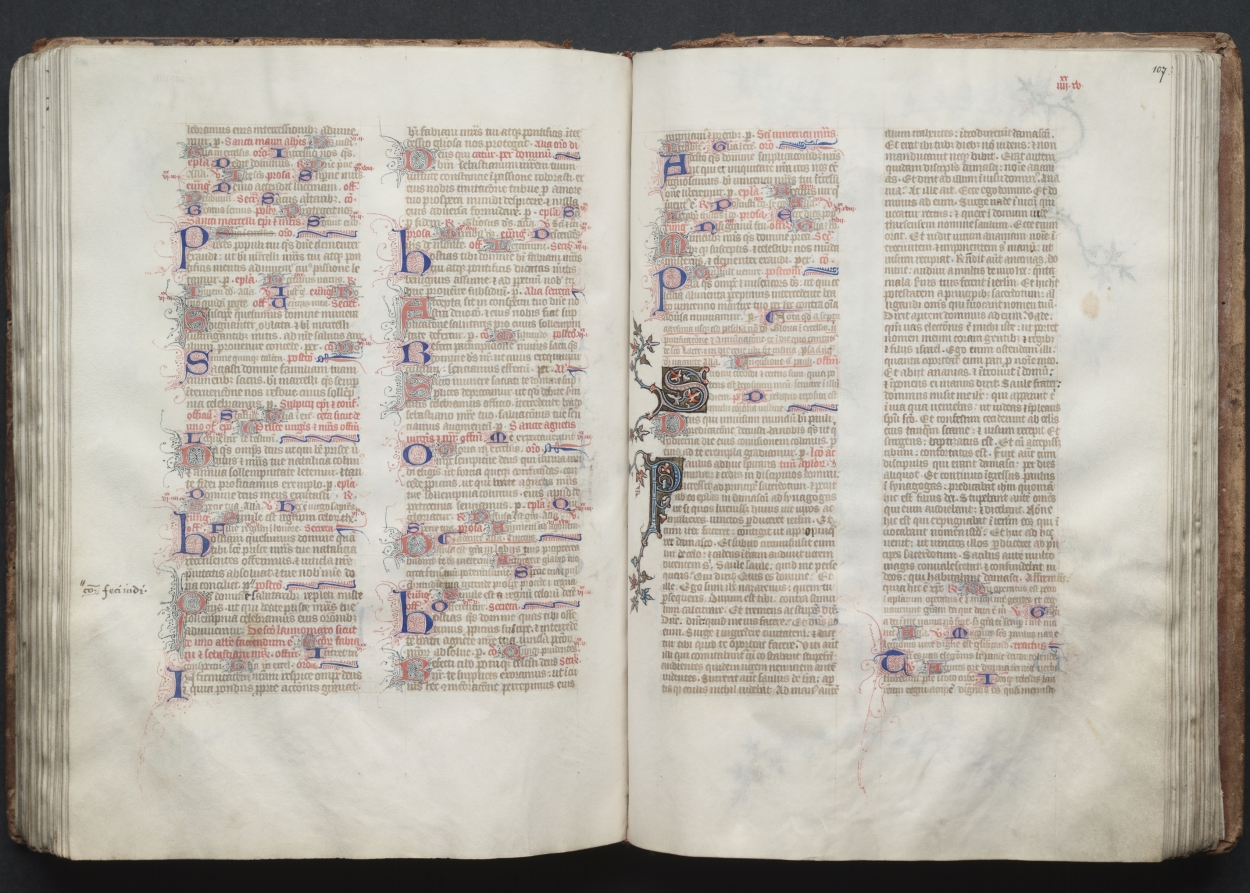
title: The Gotha Missal: Fol. 106v, Text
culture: France, Paris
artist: Master of the Boqueteaux (French)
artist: and Workshop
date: c. 1375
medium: ink, tempera, and gold on vellum; blind-tooled leather binding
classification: Bound Volume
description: The style and quality of this manuscript's decoration is typical of deluxe Parisian books made for aristocratic or royal patrons. Most of the book's decoration appears to be the work of the Master of the Boqueteaux, an artist active at the court of King Charles V (died 1380). His style was apparently shared by a number of book illuminators working in and around Paris. It is very possible that the Gotha Missal belonged to Charles V, but is not provable because the manuscript has no royal portraits and lacks a colophon. Given the book's magnificent decoration, however, it would seem that it was produced for a Valois prince, if not for the king himself. The manuscript receives its name from the German dukes of Gotha, its later owners.